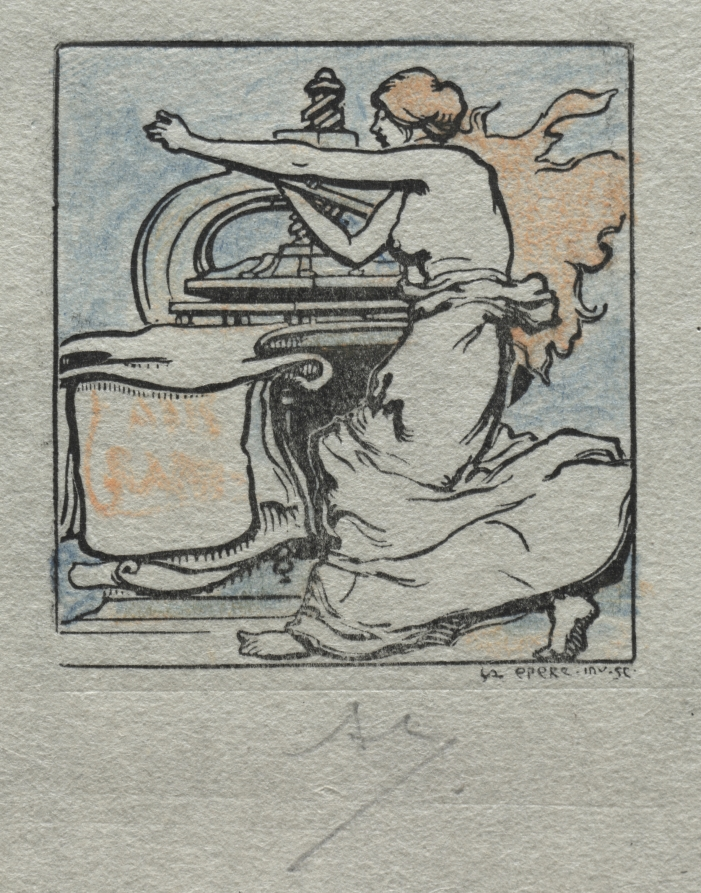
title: The Printer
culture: France, late 19th-early 20th century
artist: Auguste Louis Lepère (French, 1849–1918)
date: 1900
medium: woodcut with hand coloring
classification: Print